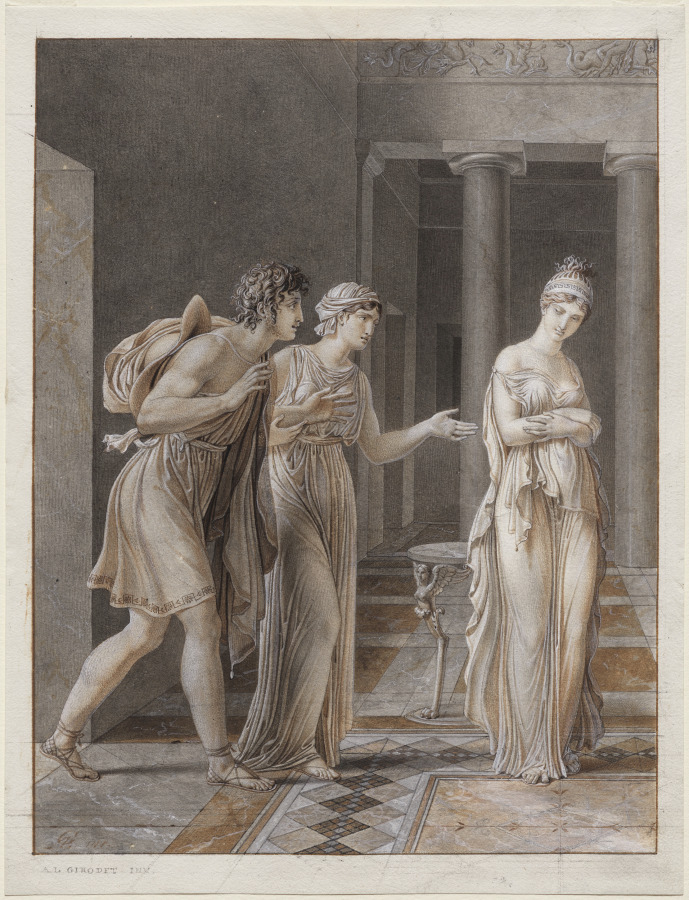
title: The Meeting of Orestes and Hermione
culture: France, early 19th Century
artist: Anne-Louis Girodet de Roucy-Trioson (French, 1767–1824)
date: c. 1800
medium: pen and brown and black ink, point of brush and brown and gray wash, with black chalk and graphite, heightened with white gouache, on cream wove paper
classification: Drawing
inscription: signed, lower left, in brown ink: ALG [artist’s monogram] / INV.; lower left, in black chalk: A L GIRODET INV.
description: When the French painter Jacques-Louis David was approached to work on a new edition of Jean Racine’s plays, he passed the task to his pupil Girodet, who excelled at illustrating literature. This highly refined drawing depicts a scene from Racine’s Andromaque, a complicated story of unrequited love and political treachery. Cléone introduces the love-blind Orestes to Hermione, who exploits his affection to make him do her bidding. Girodet skillfully contrasts Orestes’s eagerness and Hermione’s calculating character. With folded arms, she turns away, as if a statue between the columns of a cool marble interior. Yet Hermione’s sly, backward glance alerts the viewer of her cunning manipulation, which eventually drives Orestes mad.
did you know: The leg of the table behind Hermione has the form of a siren, a dangerous mythological creature that destroys anyone who hears its song.